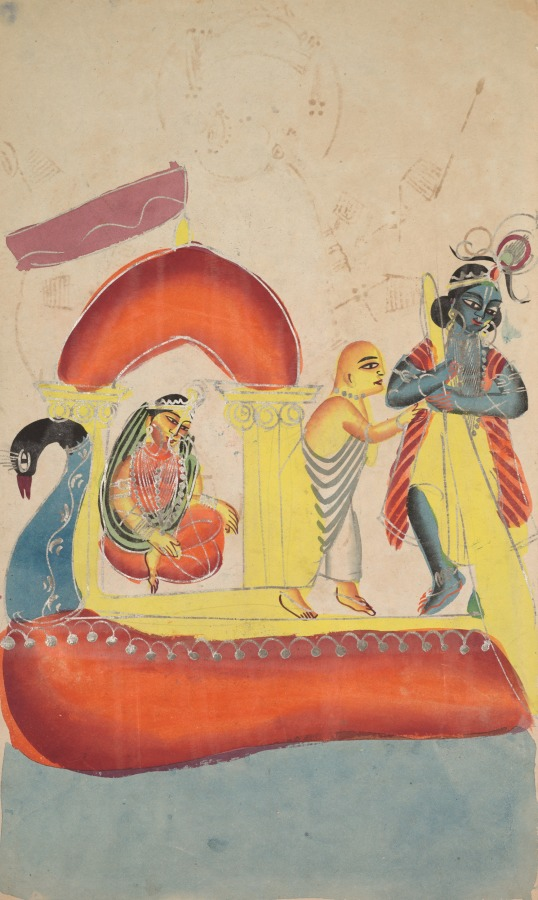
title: Krishna Ferrying Radha Across the Yamuna River (recto)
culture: Eastern India, Bengal, Kolkata, Kalighat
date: c. 1890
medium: Gum tempera, graphite, ink, and tin on paper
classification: Painting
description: This image is taken from popular dramas where Krishna, lover of the cowgirls (gopis), disguises himself as a boatman to ferry a demure Radha, his favorite gopi. It depicts devotion and the intensity of separated lovers.